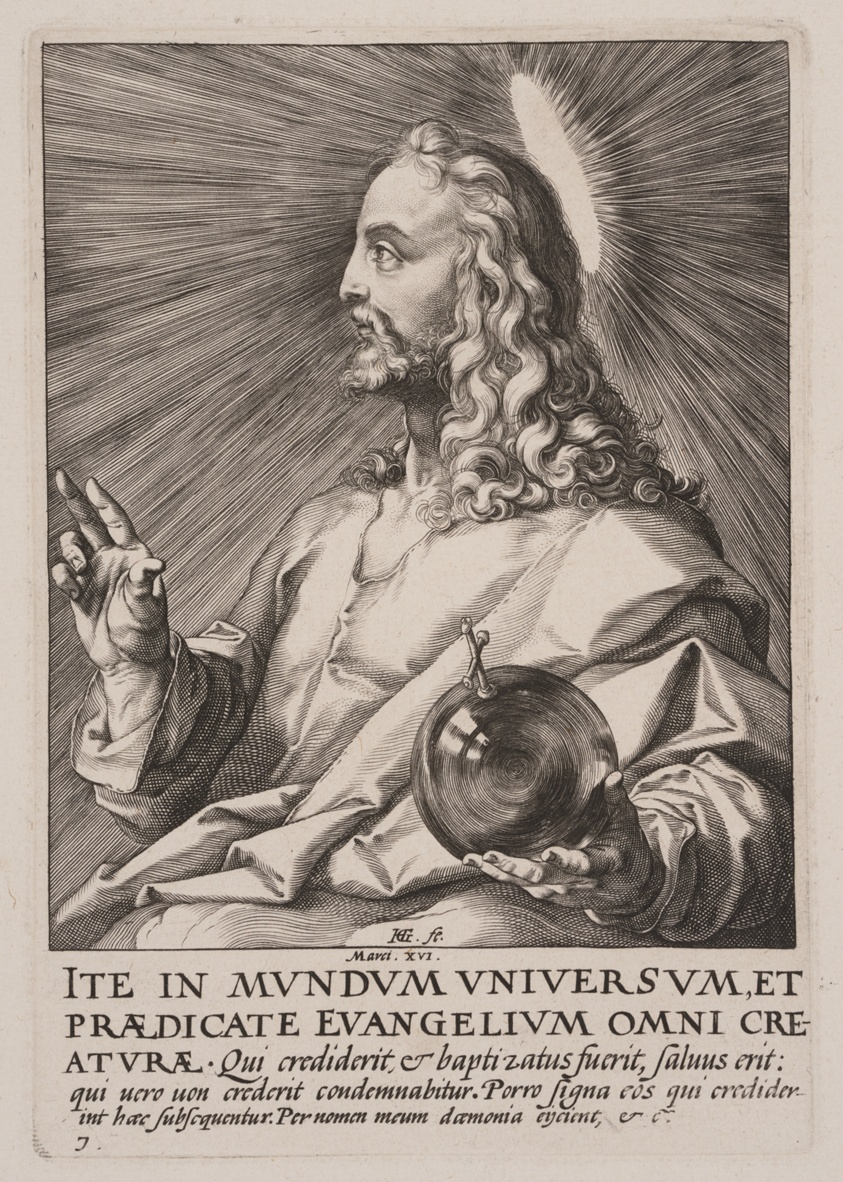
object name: Print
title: Christ (as Salvator Mundi), from Christ, the Apostles and St Paul with the Creed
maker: Hendrick Goltzius (Dutch, 1558–1617)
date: 1589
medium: Engraving on ivory laid paper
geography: Netherlands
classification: print; paper; prints and drawing; engraving